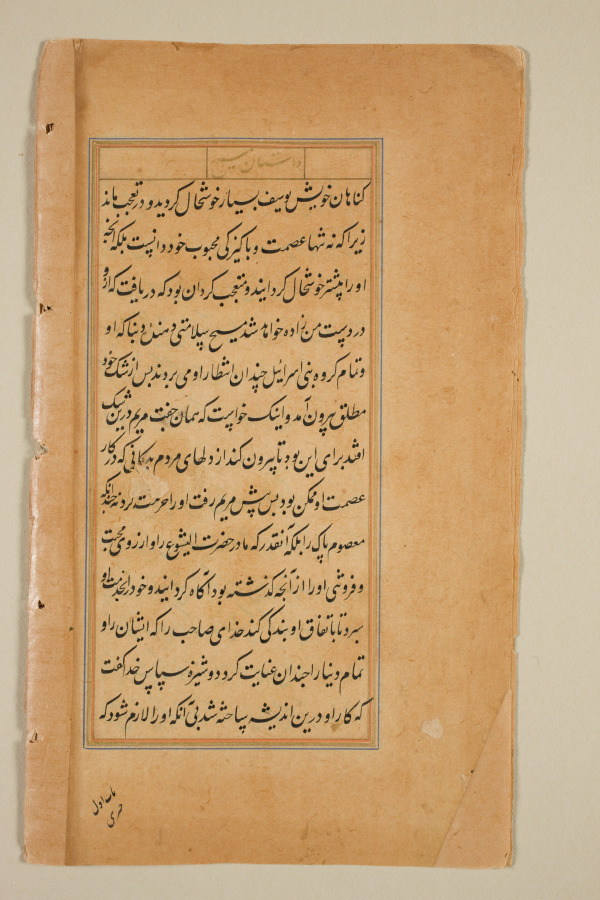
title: Text page from a Mirror of Holiness (Mir’at al-quds) of Father Jerome Xavier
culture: Mughal India, Allahabad, made for Prince Salim (1569–1627)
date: 1602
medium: Ink and gold on paper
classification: Manuscript